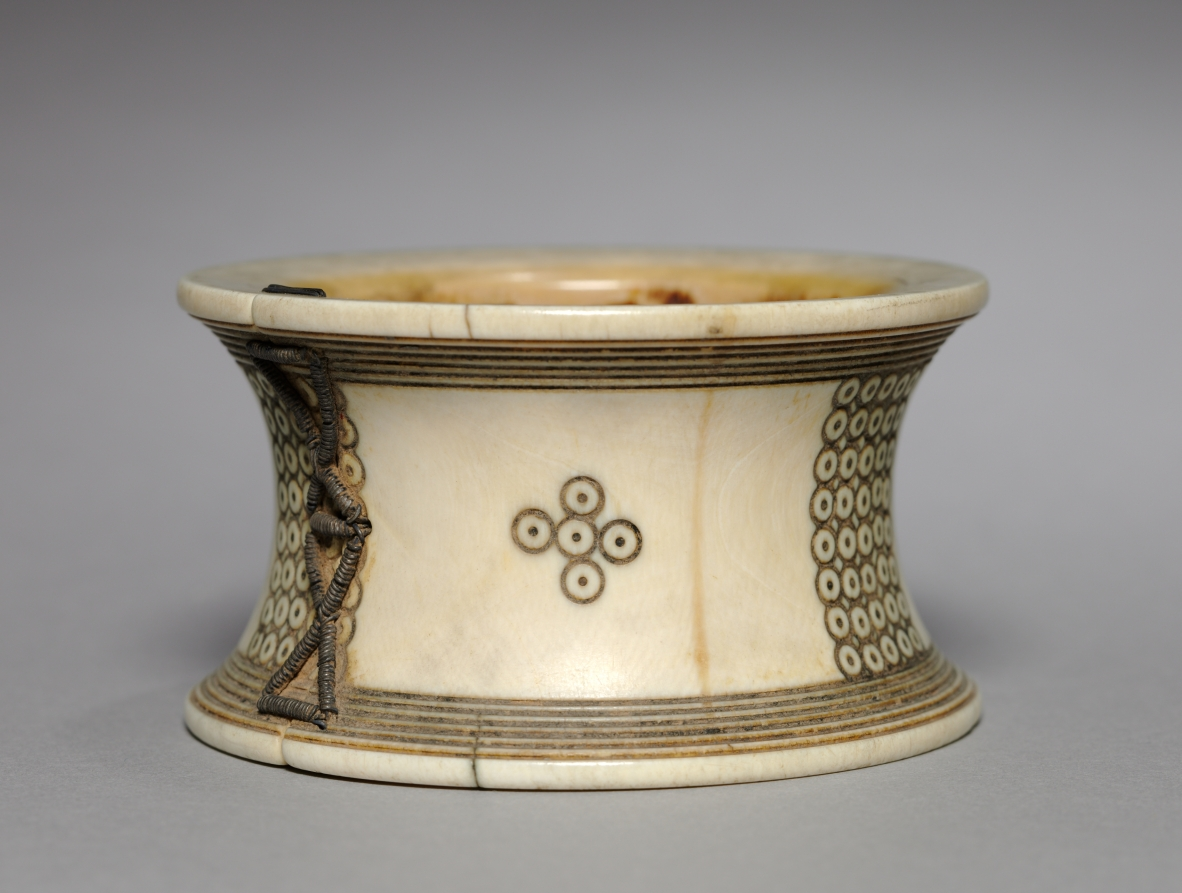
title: Bracelet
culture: Africa, Central Africa, Democratic Republic of the Congo, Kuba-style maker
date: c. 1900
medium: Ivory and wire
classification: Jewelry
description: This ivory bracelet is simple, yet elegant. Note how the delicate wire repair by a Kuba artisan adds a counterpoint pattern to the original design.